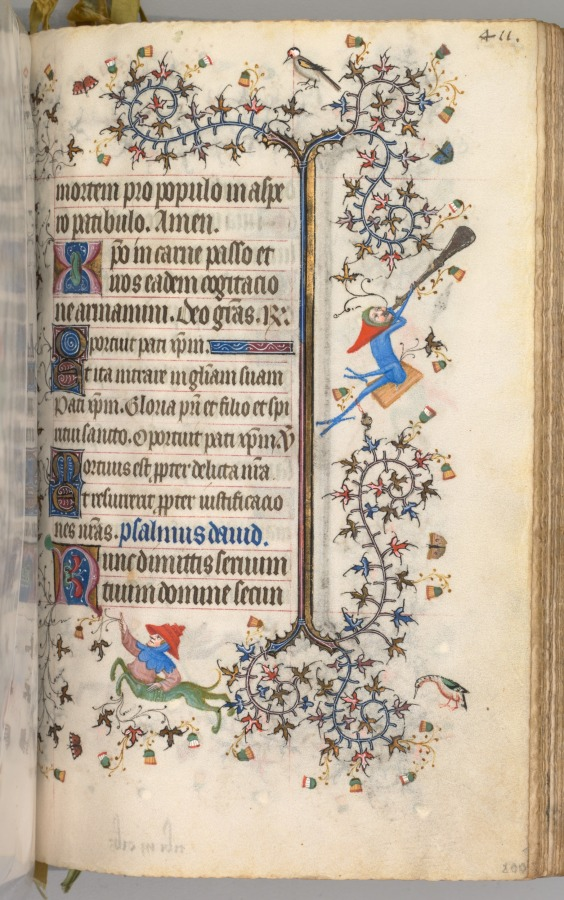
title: Hours of Charles the Noble, King of Navarre (1361-1425): fol. 200r, Text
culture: France, Paris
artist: Master of the Brussels Initials and Associates (French)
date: c. 1405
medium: ink, tempera, and gold on vellum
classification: Bound Volume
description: This precious volume was obviously highly prized by its owner, the French-born King of Navarre, who had his coat of arms painted on no less than twenty folios. Rather than directly commissioning this manuscript from a specific workshop, it seems that Charles the Noble acquired his book of hours -- perhaps ready-made for the luxury market -- while on a trip to Paris in 1404-05. A collaborative effort, six painting styles are evidenced within the pages of this codex, those of two Italians, two Frenchmen, and two Netherlanders. The painter who was responsible for the planning and decoration of the book, and who produced seventeen of the large miniatures, was a Bolognese artist known as the Master of the Brussels Initials. His principal assistant, responsible for most of the borders, was a Florentine who signed his name "Zecho" da Firenze on folio 208 verso.